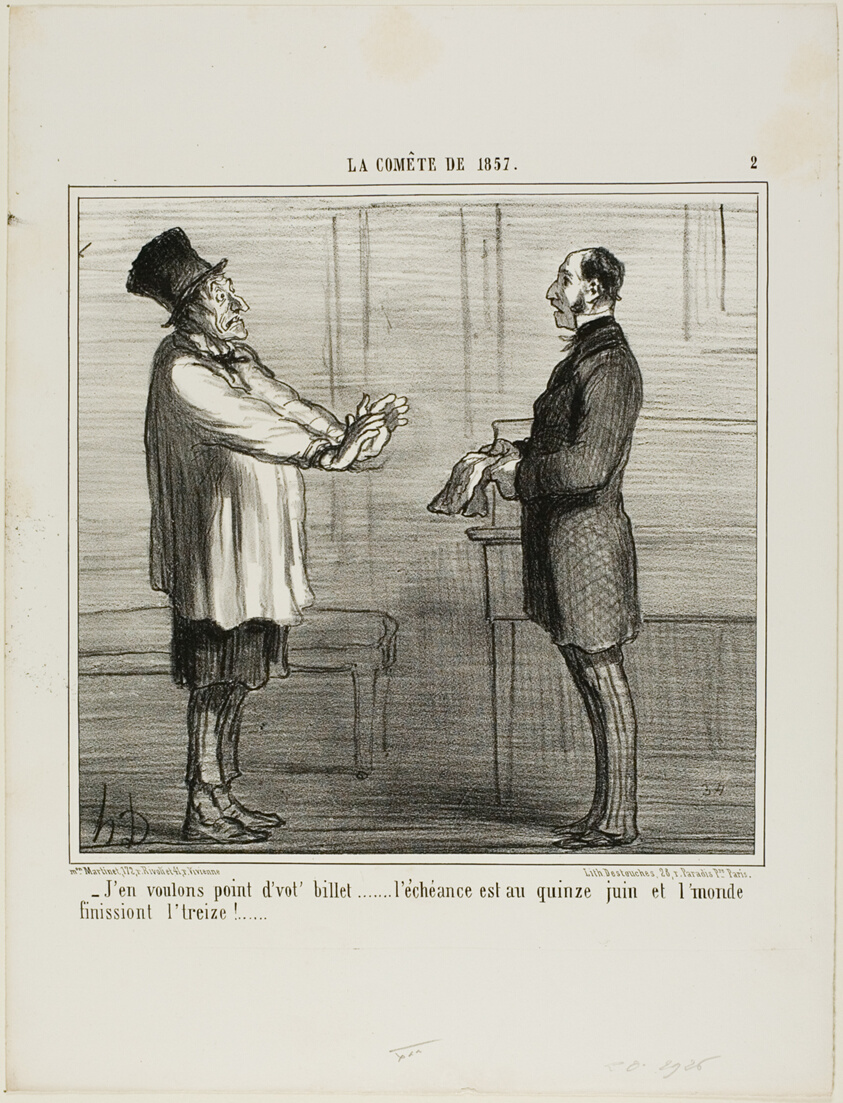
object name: Print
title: “- I don't want your credits... the expiration date is on the 15th of June and the world is supposed to end on the 13th,” plate 2 from La Cométe De 1857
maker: Honoré Victorin Daumier; French, 1808-1879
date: 1857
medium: Lithograph in black on white wove paper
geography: France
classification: lithograph; print; prints and drawing